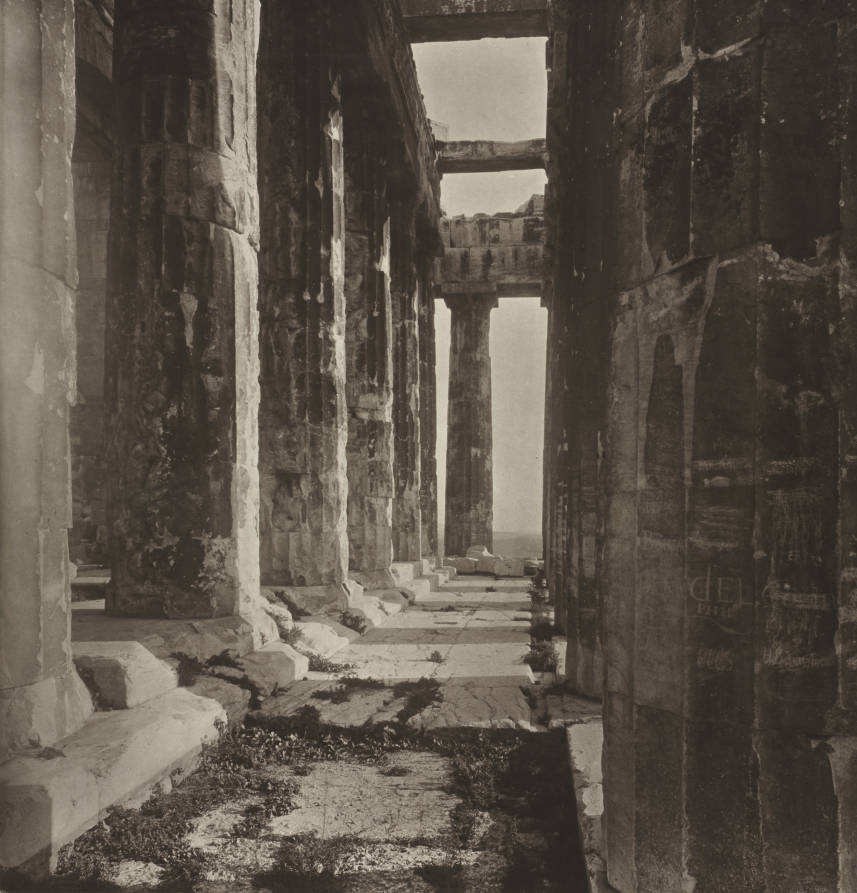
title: Western Portico of the Parthenon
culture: America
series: The Acropolis of Athens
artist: William James Stillman (American, 1828–1901)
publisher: The Autotype Company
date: 1882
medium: albumen print from gelatin dry plate negative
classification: Photograph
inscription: Written in pencil on verso: "Stillman / 12 [?] West Portico of Parthenon"; "X2390.03"